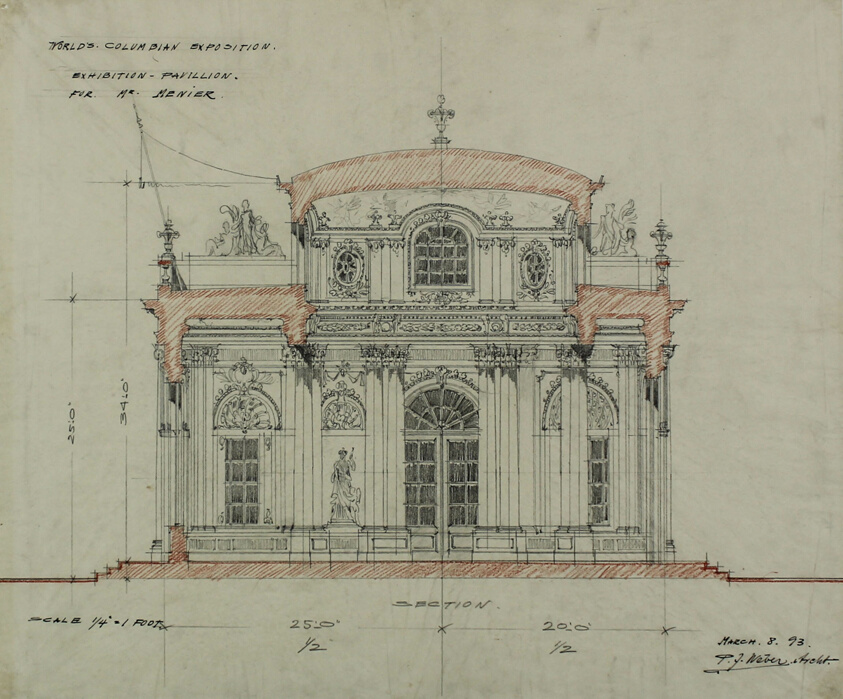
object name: Architectural Drawing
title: Chocolate-Menier Pavilion, World's Colombian Exposition, Chicago, Illinois, Section Sketch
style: 19th century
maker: Peter Joseph Weber (American, 1863–1923)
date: 1893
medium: Graphite, red pencil, and ink on tracing paper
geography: United States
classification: design drawing; architectural drawing; architecture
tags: world's fairs, Chicago, architecture, design, pavilions